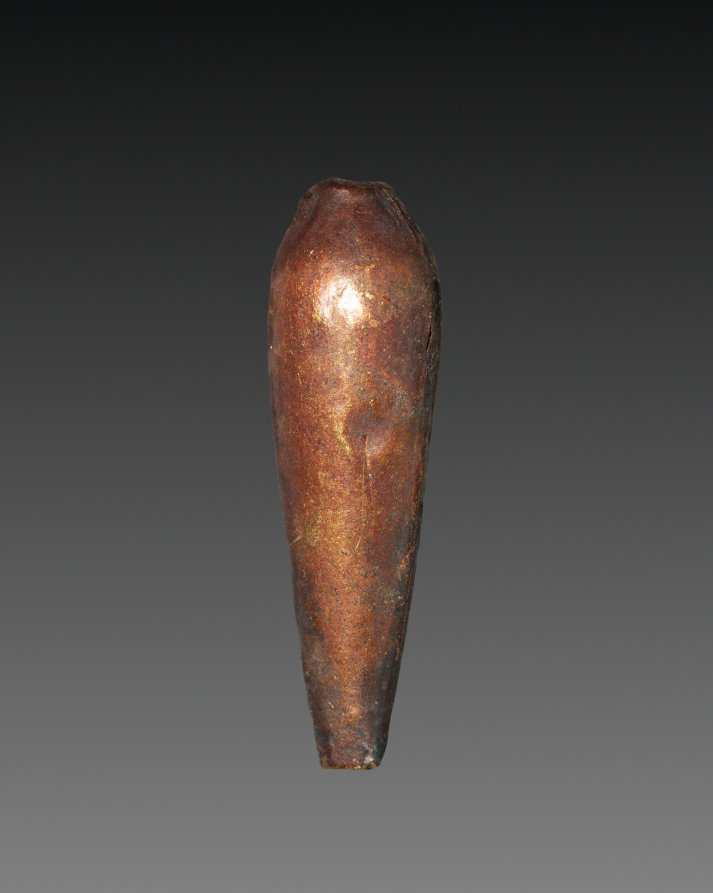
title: Teardrop-Shaped Bead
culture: Egypt, Middle Kingdom (2040–1648 BCE), Dynasty 12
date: 1980–1801 BCE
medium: gold over calcite gesso core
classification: Jewelry